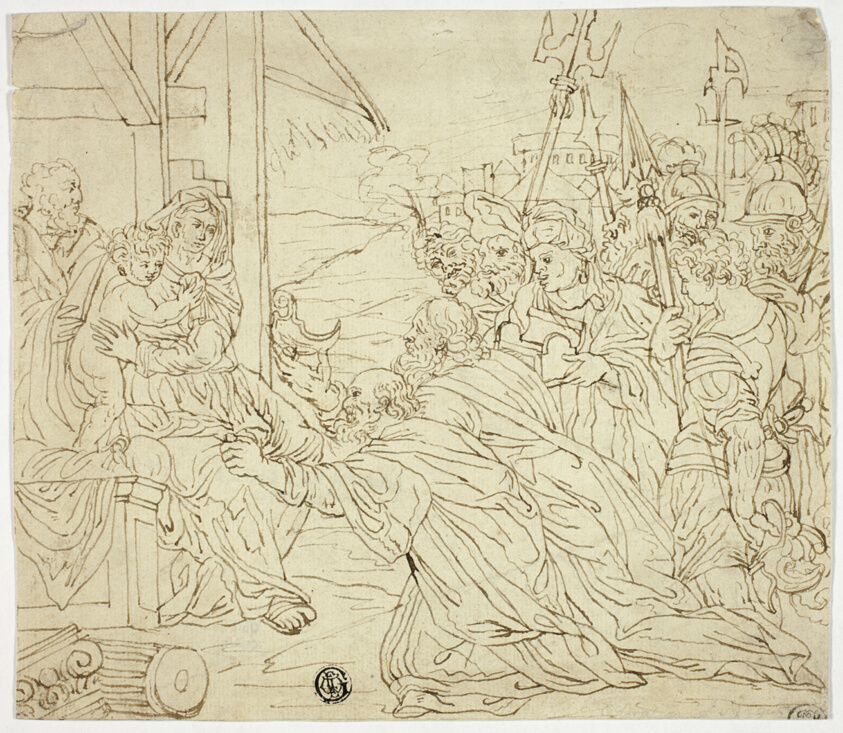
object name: Drawing and Watercolor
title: Adoration of the Magi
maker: Unknown Artist; English, 17th/18th century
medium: Pen and brown ink, on ivory laid paper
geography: United Kingdom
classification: pen and ink drawings; drawings (visual works); prints and drawing